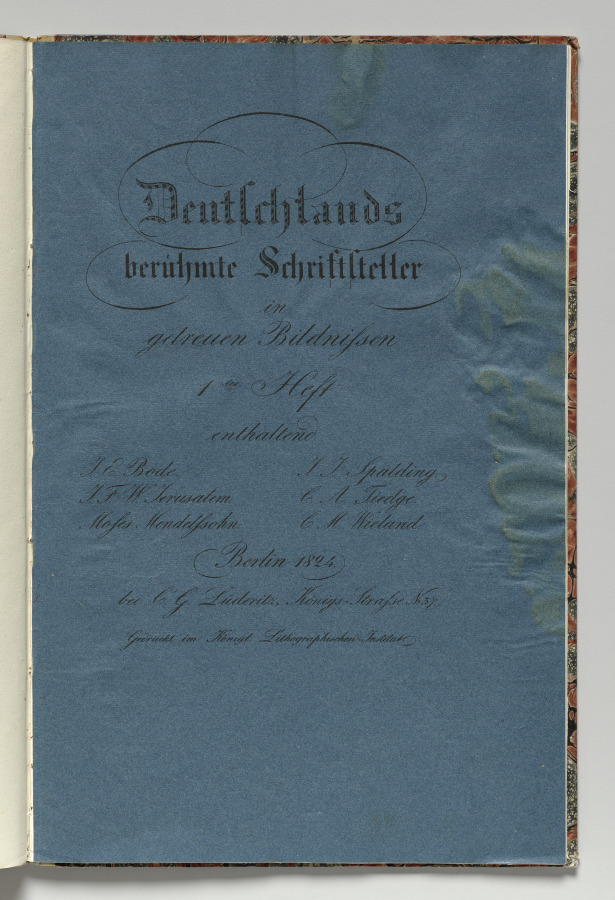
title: Germany's Famous Authors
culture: Germany, 19th century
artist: Gustav Karl Friedrich Lüderitz (German, 1803–1884)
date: 1824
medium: portfolio of 6 lithographs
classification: Print